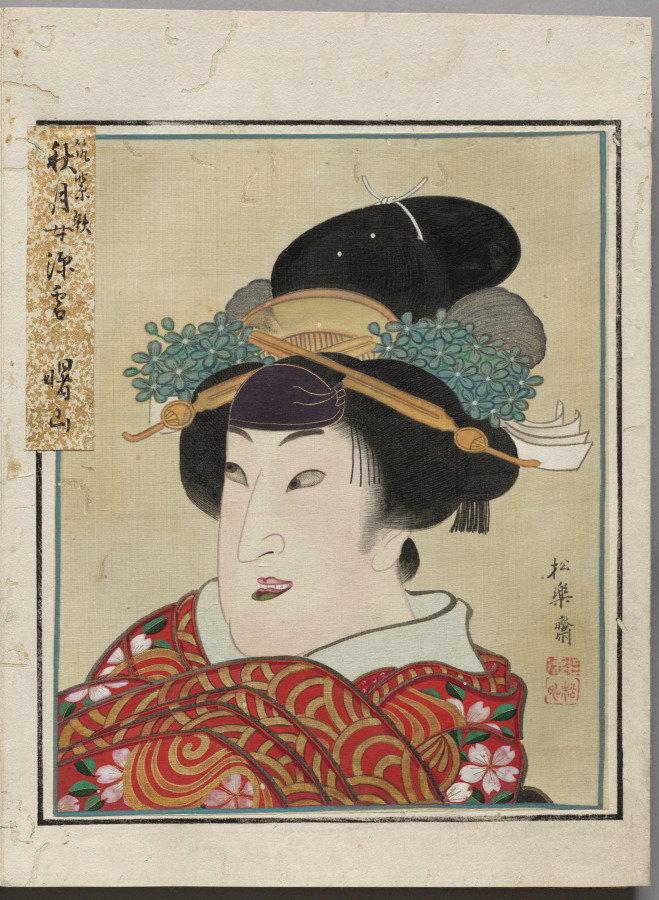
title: Double-Leaf from Album of Actor Portraits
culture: Japan, Edo period (1615–1868)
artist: Shōrakusai (Japanese)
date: c. 1790–1810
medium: double-leaf from an accordion-style album; ink and color on silk (right), and ink on paper (left)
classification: Bound Volume